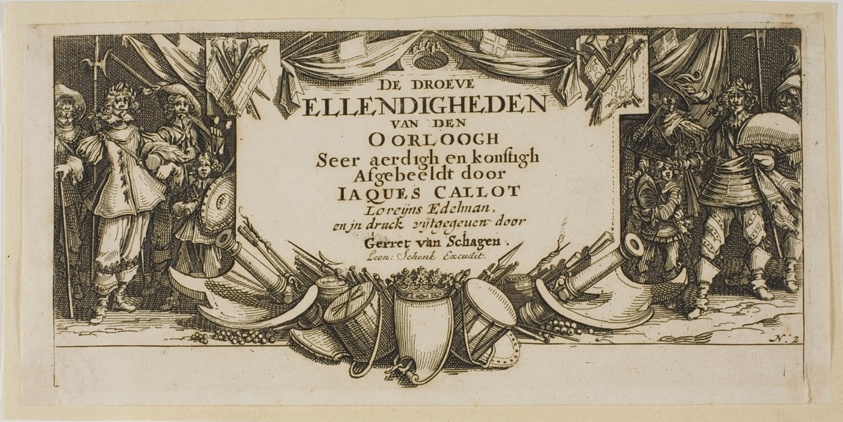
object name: Print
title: Frontispiece, from The Large Miseries of War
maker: Gerrit Lucasz van Schagen (Dutch, born 1642); after Jacques Callot (French, 1592-1635)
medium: Etching on paper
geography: Netherlands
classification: etching; print; prints and drawing